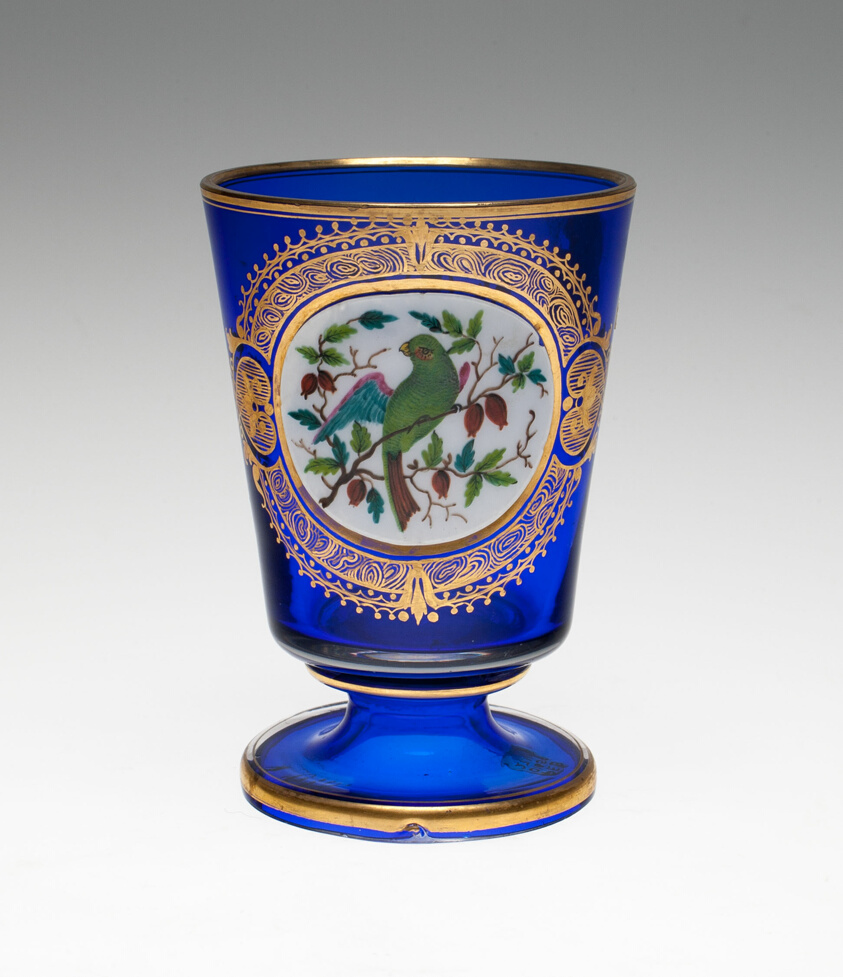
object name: Glass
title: Beaker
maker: Bohemia, Czech Republic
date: c. 1850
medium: Glass; colorless, blown, enameled, opaque white and gilding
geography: Bohemia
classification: drinking vessel; glass; european decorative arts